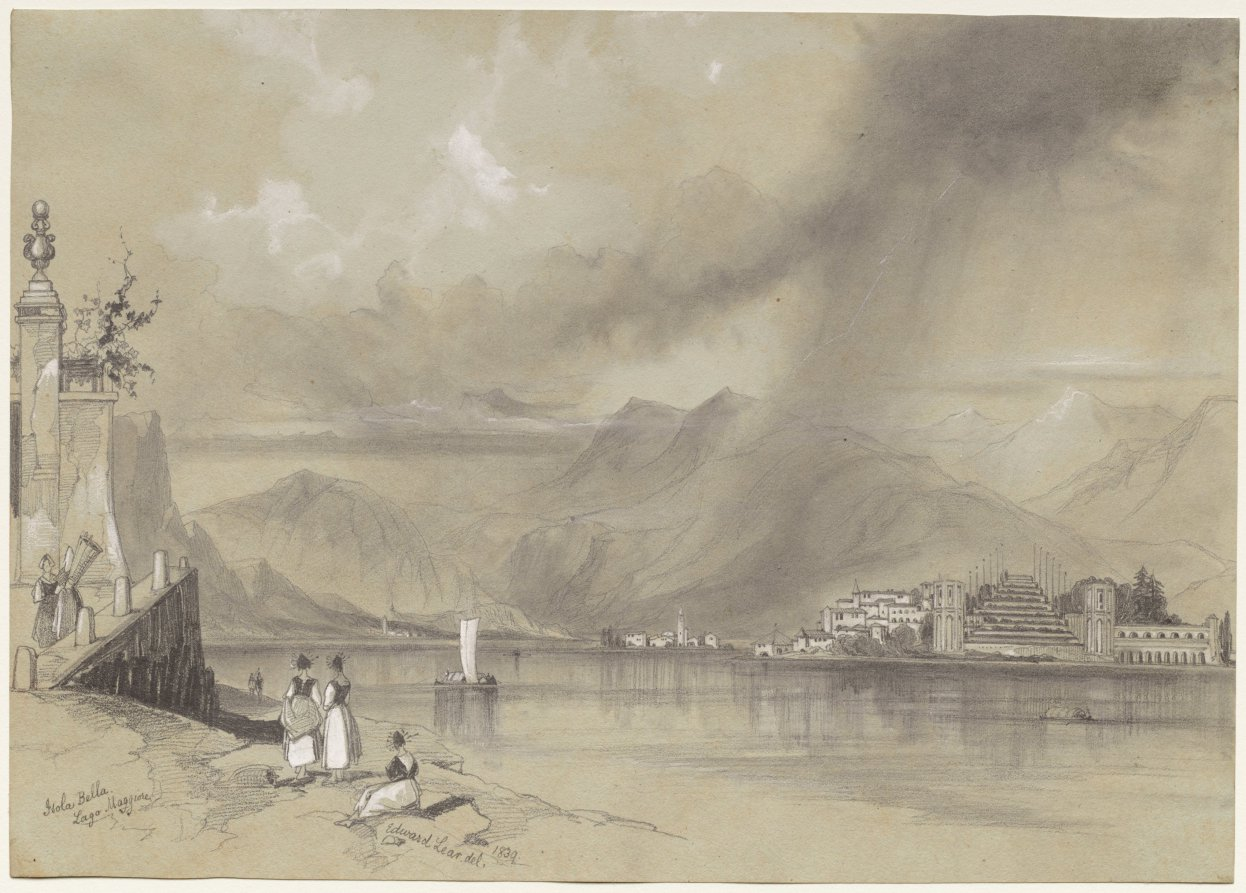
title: Isola Bella, Lago Maggiore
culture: England, 19th century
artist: Edward Lear (British, 1812–1888)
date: 1839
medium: graphite heightened with white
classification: Drawing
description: Most famous for humorous poems such as "The Owl and the Pussycat," Lear was also a painter and illustrator who wittily described himself as "Greek Topographical Painter par excellence." As a young artist, he traveled to Rome and remained abroad for the majority of his life. He undertook walking tours in Italy, Greece, Switzerland, and France, and sketched assiduously. Upon finding what he deemed a good subject, Lear observed the scenery through a monocle and then rapidly sketched the details of the view in graphite, usually recording the precise location and date. Later, he worked up the drawing in ink and laid in color washes. This drawing records a view of Lake Maggiore in Italy.